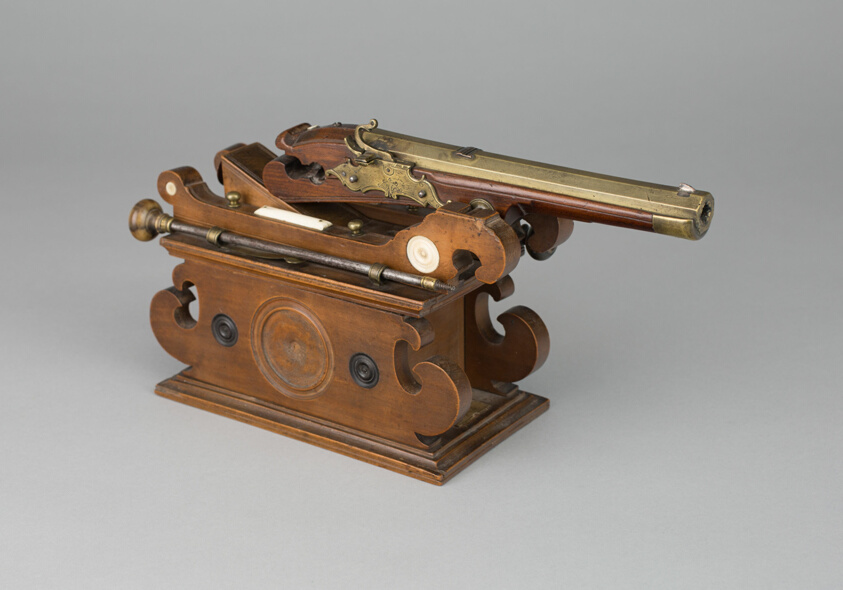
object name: Arms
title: Miniature Model of a Wall Gun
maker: German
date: 1670/1700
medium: Brass, wood, ivory, and ebony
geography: Germany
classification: firearm-cannon; arms; arms and armor